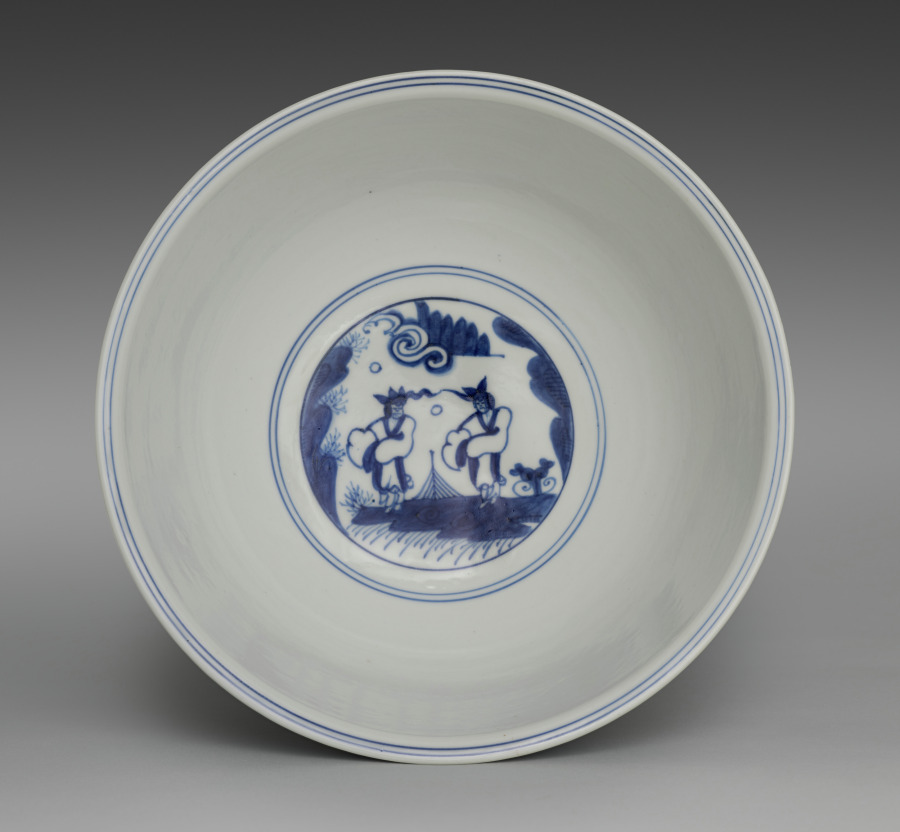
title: Bowl from Nesting Bowls with Daoist Immortals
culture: Japan, Meiji period (1868–1912)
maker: Seifū Yohei III (Japanese, 1851–1914)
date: 1893–1914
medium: Outer bowl from a set of three bowls; porcelain with underglaze blue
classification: Ceramic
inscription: 清風与平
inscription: 大日本清風造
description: Yohei III was capable of ink painting–like compositions in underglaze blue, as well as more decorative ones like that on this set of three nesting bowls. Bowls with very similar designs in five colors were produced in the reign of the Wanli emperor (r. 1572–1620) during the Ming dynasty, and Yohei must have had direct access to one of these or to a close copy. A scene of Daoist immortals is presented on the bowls. On each one, the ground plane is defined with a blue wash. Four lanterns are evenly spaced around the bowl. Two are flanked with linked-piece metalwork banners of the seven treasures. The alternate altars are adorned with textile banners. In between them are four immortals, each standing beneath a tree with small plants surrounding his feet. Two of the immortals hold fruit on a tray. Another carries an elixir-filled ewer and a willow branch. The fourth holds a swastika (manji), here an auspicious symbol, and a flower. Curiously, the inscription inside each footring reads “Made by Seifu of Great Japan,” in emulation of the dynasty and reign inscriptions that appear on Chinese ceramics; however, one can also see through the translucent glaze another inscription, “Seifu Yohei,” written in large characters within a double band of blue on the largest bowl.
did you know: In the bottom of each bowl is a scene of two robed immortals who appear to stand on a precipice in a mountainous landscape high in the clouds, with celestial orbs over their heads.